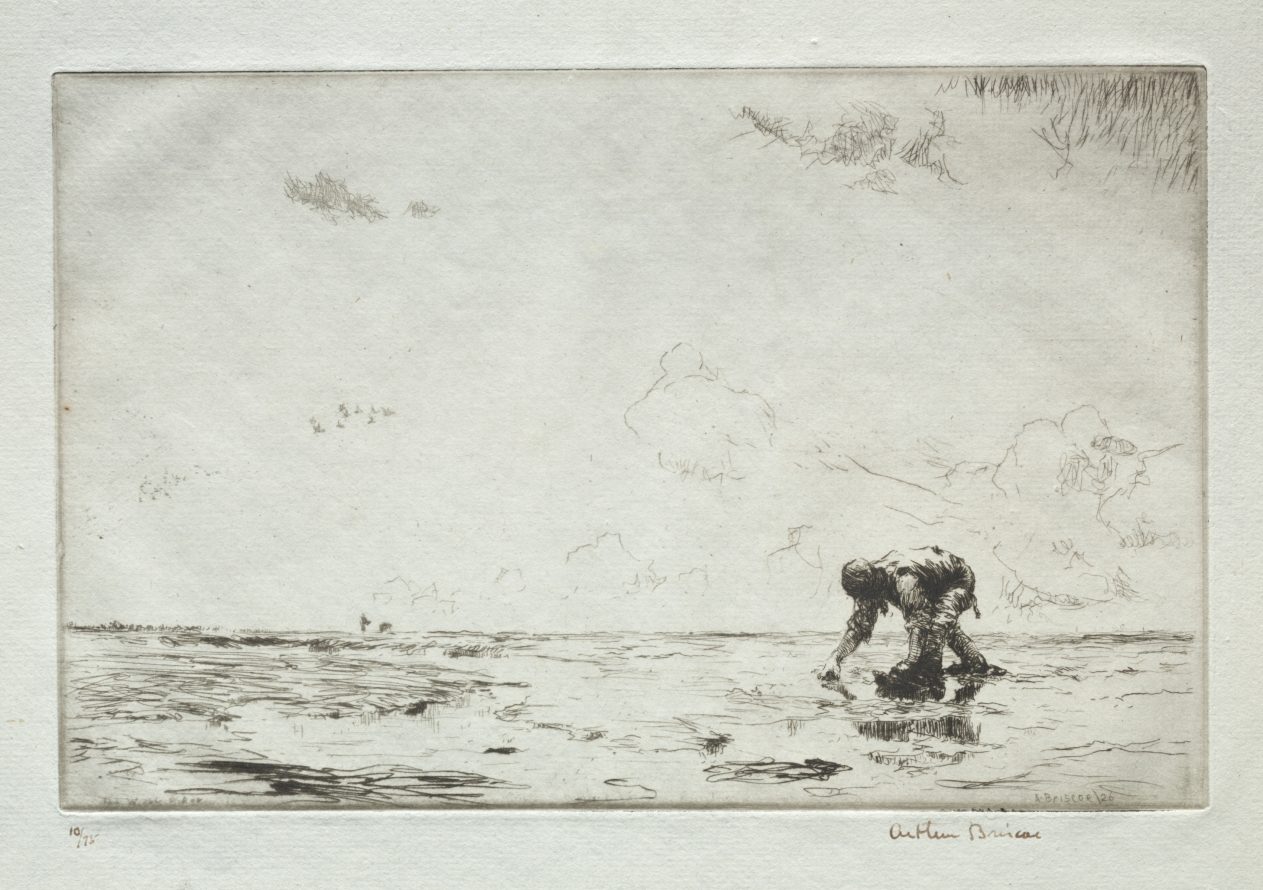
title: The Winkle Picker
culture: England, 20th century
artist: Arthur John Trevor Briscoe (British, 1873–1943)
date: 1926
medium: etching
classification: Print